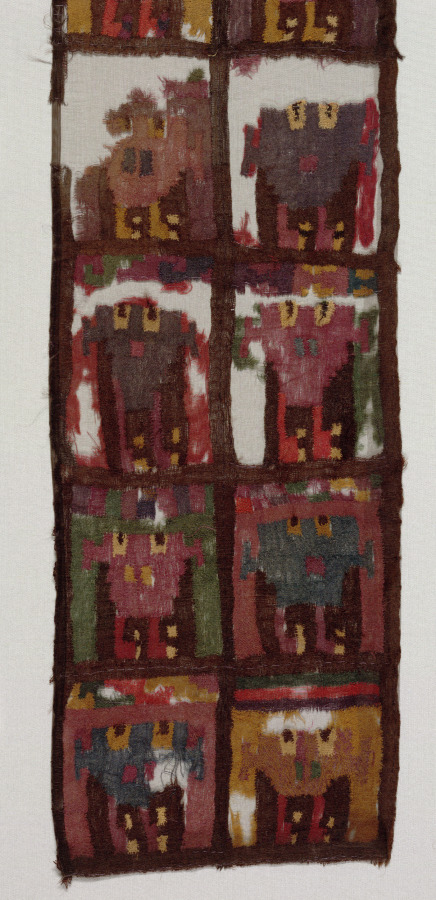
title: Band with Trophy Heads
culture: Peru, South Coast, Nasca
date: 100 BCE–700 CE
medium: interlocking warp and weft, single interlock: wool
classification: Textile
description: This band, remarkable for its intense color and spider-web sheerness, was created using an unusual technique known as discontinuous warp and weft. That is, none of the vertical or horizontal yarns are continuous from one side of the band to the other. Rather, they travel back and forth within their own color areas, linking at the edges with yarns in adjacent areas. This is a difficult feat when weaving on a loom and the creator likely used another approach, such as darning with a needle over a ground cloth that was then removed. The image repeated in each of the band’s rectangles is a head supported on two little feet.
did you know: This band is made in with a weaving technique that is unique to the ancient Andes.